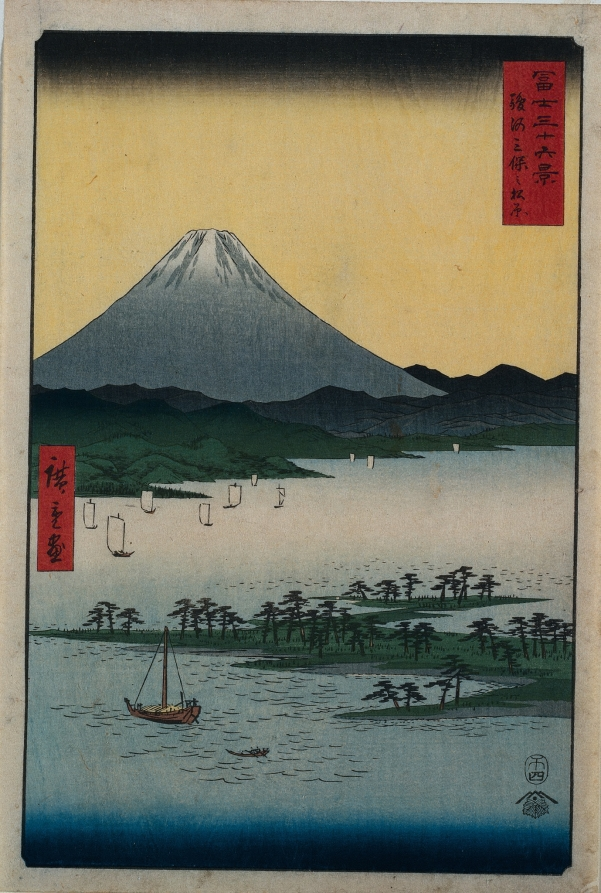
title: Pine Groves of Miho in Suruga, from the series Thirty-six Views of Mount Fuji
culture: Japan, Edo period (1615–1868)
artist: Utagawa Hiroshige (Japanese, 1797–1858)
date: 1858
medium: Color woodblock print, ink and color on paper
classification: Print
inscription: Signature: Hiroshige ga Publisher: Tsutaya Kichizo (emblem)